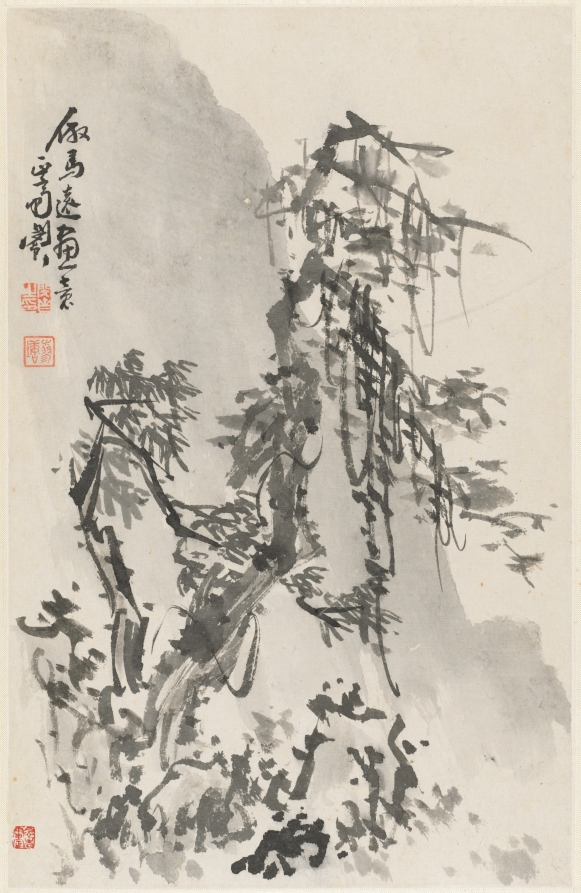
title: Landscape in the Manner of Ma Yuan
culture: China, Qing dynasty (1644-1911)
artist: Min Zhen (Chinese, 1730–after 1788)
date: 1788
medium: album leaf, ink on paper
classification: Painting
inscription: Inscription by Min Chen on the last leaf: I have a habit of collecting strange rocks. My friend Tai-li shan-jen* treasures my paintings as much as I treasure strange rocks. Once we agreed to exchange what we love with each other. However, my busy activities have kept me from carrying this out. This summer I realized that this strange rock has been sitting in my studio for five years, so I painted this to fulfill my old promise. As a record, I chose the grotesque cliff in the last scene of this twelve-leaf album. Cheng-chai, Min Chen inscribed this on the sixth day of the sixth month [July 9] of the wu-shen year [1788]. * Tai-li shan-jen is Wang Li [tzu: Li-fu] tr. Hou-mei Ishida Six seals appearing on the leaves: Min Chen, Cheng-chai, Ching-ch'iao, Chen, Liao-t'ang, Min Chen chih-yin.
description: Min Zhen, who was orphaned at age 12 and developed an eccentric personality, was trained by Tang Yin (1682–1756), a writer, playwright, and superintendent of the imperial porcelain workshops in Jingdezhen. The connection to him may have enabled Min to stay in Beijing for a decade from around 1773. It is not clear whether he ever resided in Yangzhou, but his style is in many instances reminiscent of that of Yangzhou artist Huang Shen. This album demonstrates Min’s versatility and mature style in the last years of his life.